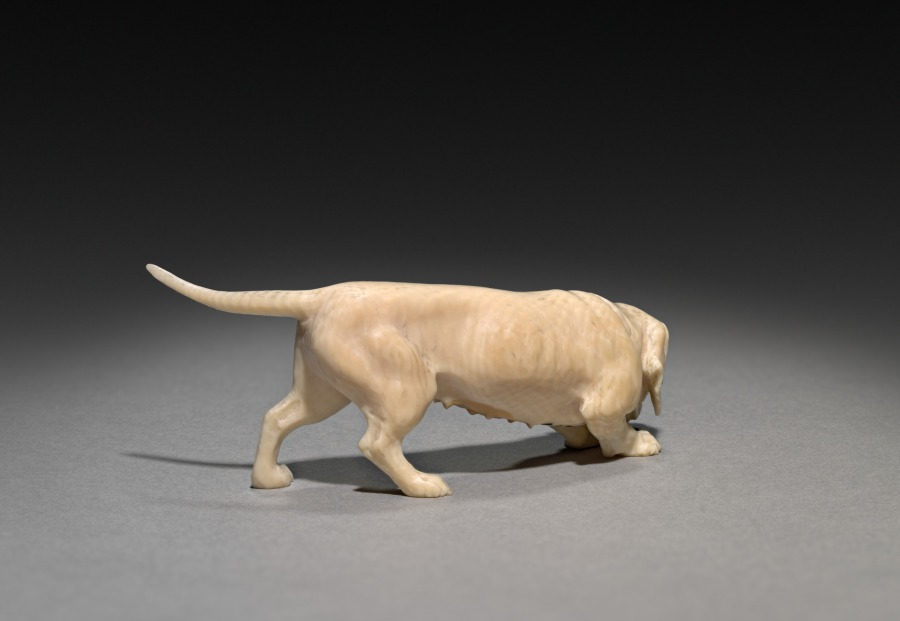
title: Dachsund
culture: Japan, Meiji period (1868–1912)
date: early 1900s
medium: ivory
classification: Ivory